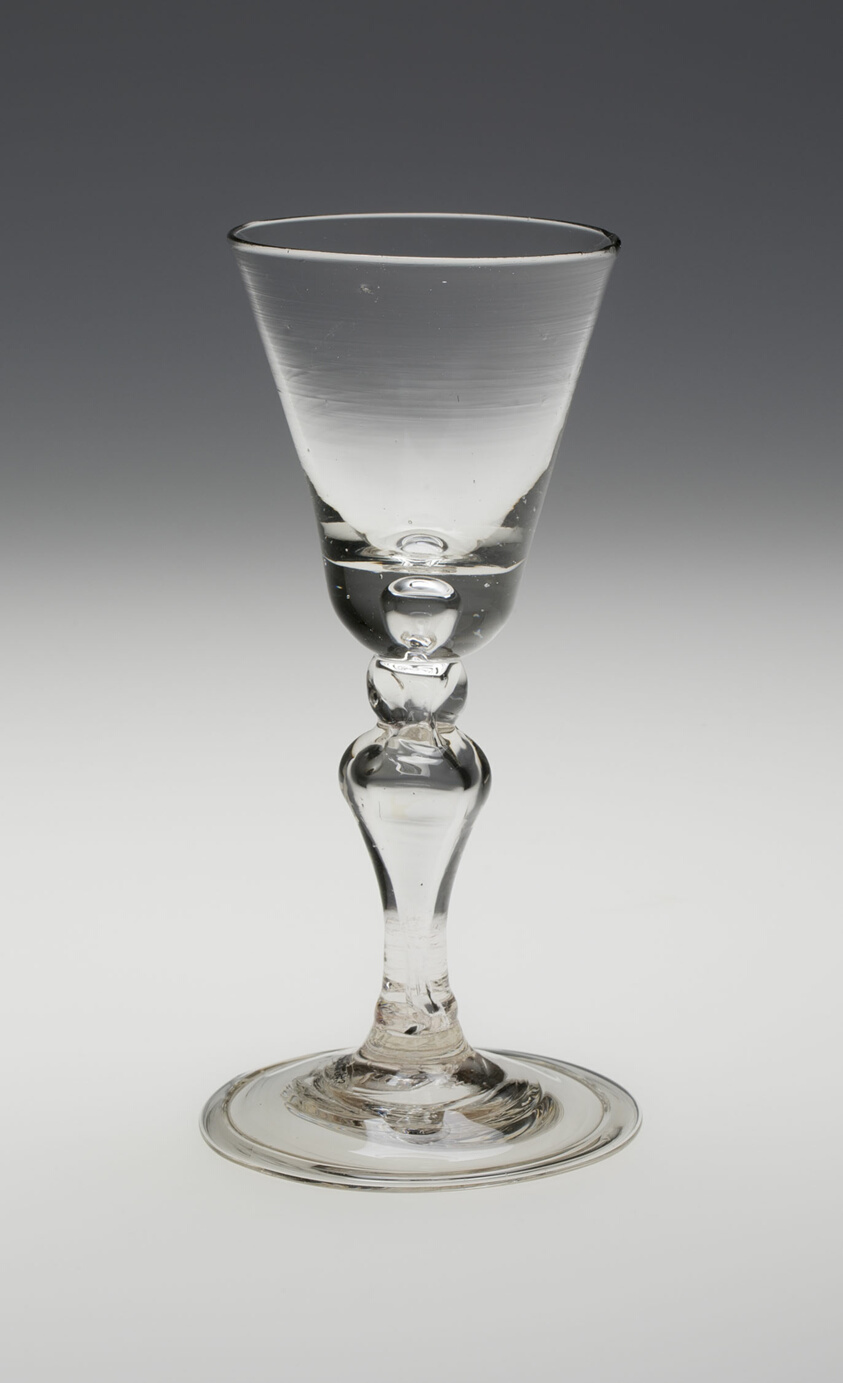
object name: Glass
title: Wine Glass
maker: England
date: c. 1720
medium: Glass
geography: England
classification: drinking vessel; european decorative arts; glass